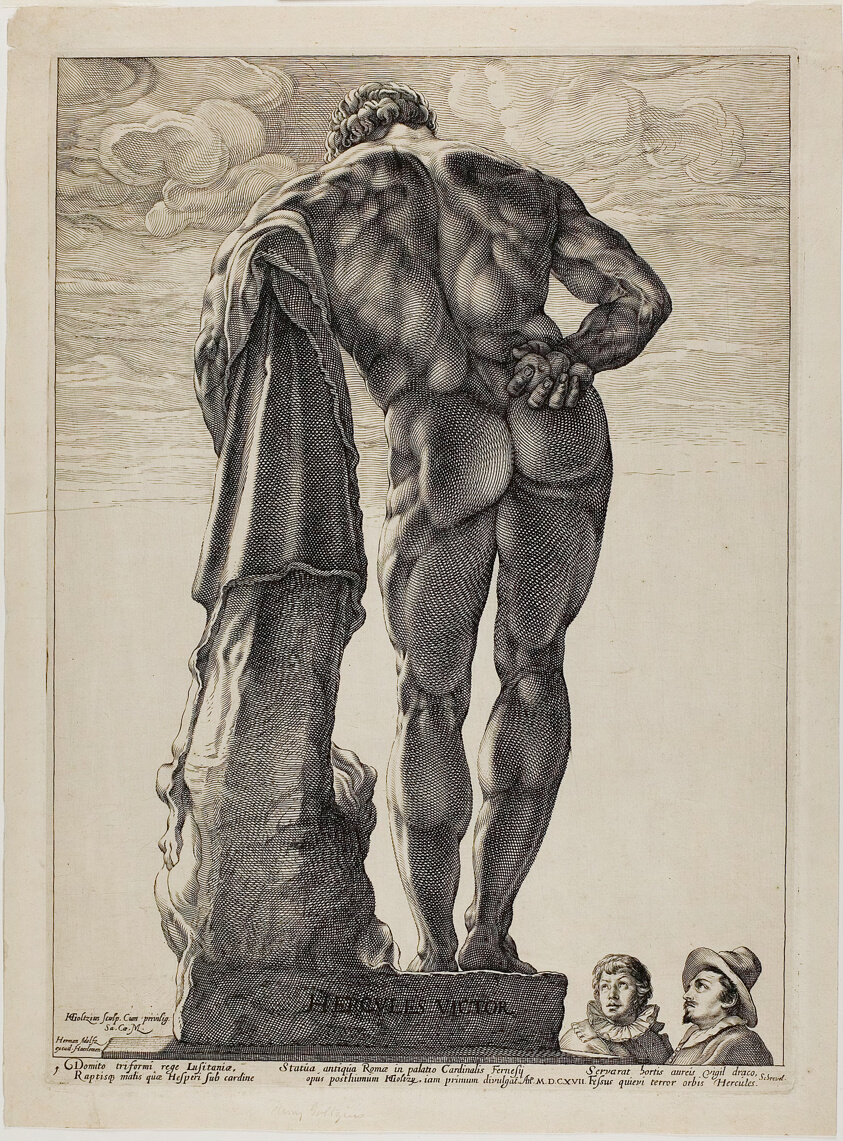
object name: Print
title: The Farnesian Hercules, plate one from Three Famous Antique Sculptures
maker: Hendrick Goltzius (Dutch, 1558-1617); text written by Theodorus Schrevelius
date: c. 1592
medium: Engraving on paper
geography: Netherlands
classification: engraving; print; prints and drawing